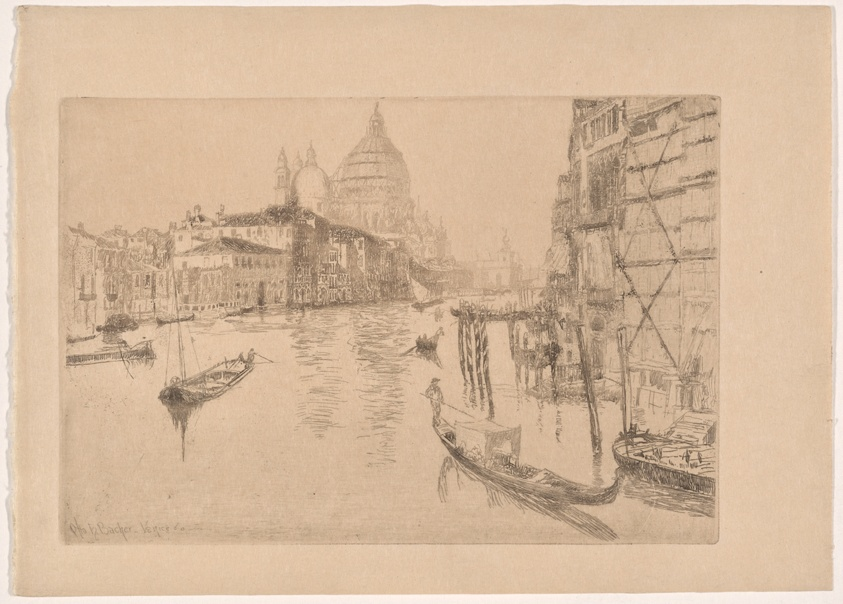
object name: Print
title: Entrance to Canal Grande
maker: Otto Henry Bacher (American, 1856-1909)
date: 1880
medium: Etching in brown on cream Japanese paper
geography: United States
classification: prints and drawing; paper; print; etching